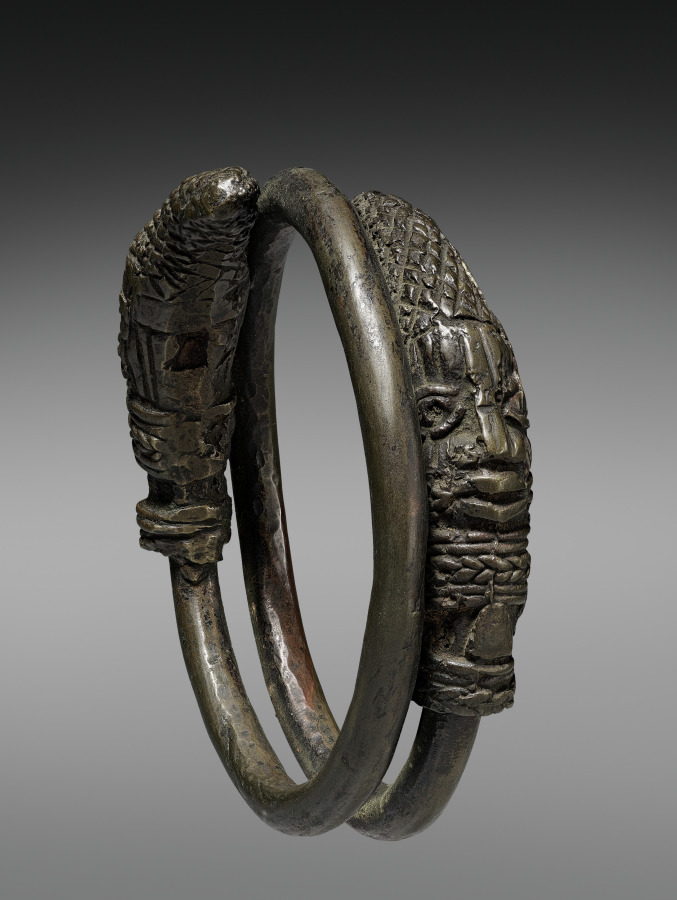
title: Hand Coil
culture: Nigeria, Benin Kingdom, Ẹdo peoples, members of the Igun Eronmwon (royal brasscasters) guild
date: 1800s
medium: Copper alloy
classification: Implements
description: While this looks like a bracelet, it wasn’t worn around a wrist. A chief or titleholder grasped this “hand coil” vertically during the annual Iguẹ festival, during which such men reaffirm their relationship to the Ọba, whose mystical powers are strengthened. An image of a man’s head caps each end of the thick, twisted metal. Repeated human touch rubbed the undecorated lengths bright and shiny. Though small, the coil’s detail is enormous: to capture it, the artist incised the designs in wax during the casting process. They show these men are elites, with necklaces, caps, and whisker-like facial markings.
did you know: This is a unique object; it was made using the lost-wax casting technique, which destroys the wax mold in the creation process.